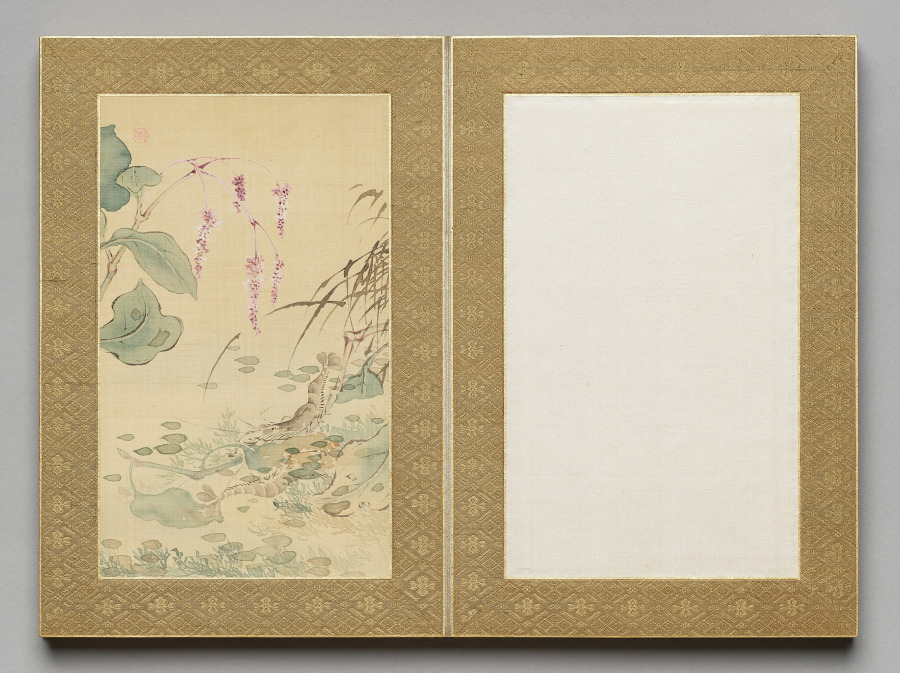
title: Painting from Flowers and Grasses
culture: Japan, Edo period (1615–1868)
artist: Tsubaki Chinzan (Japanese, 1801–1854)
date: 1841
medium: album; ink and color on silk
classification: Painting